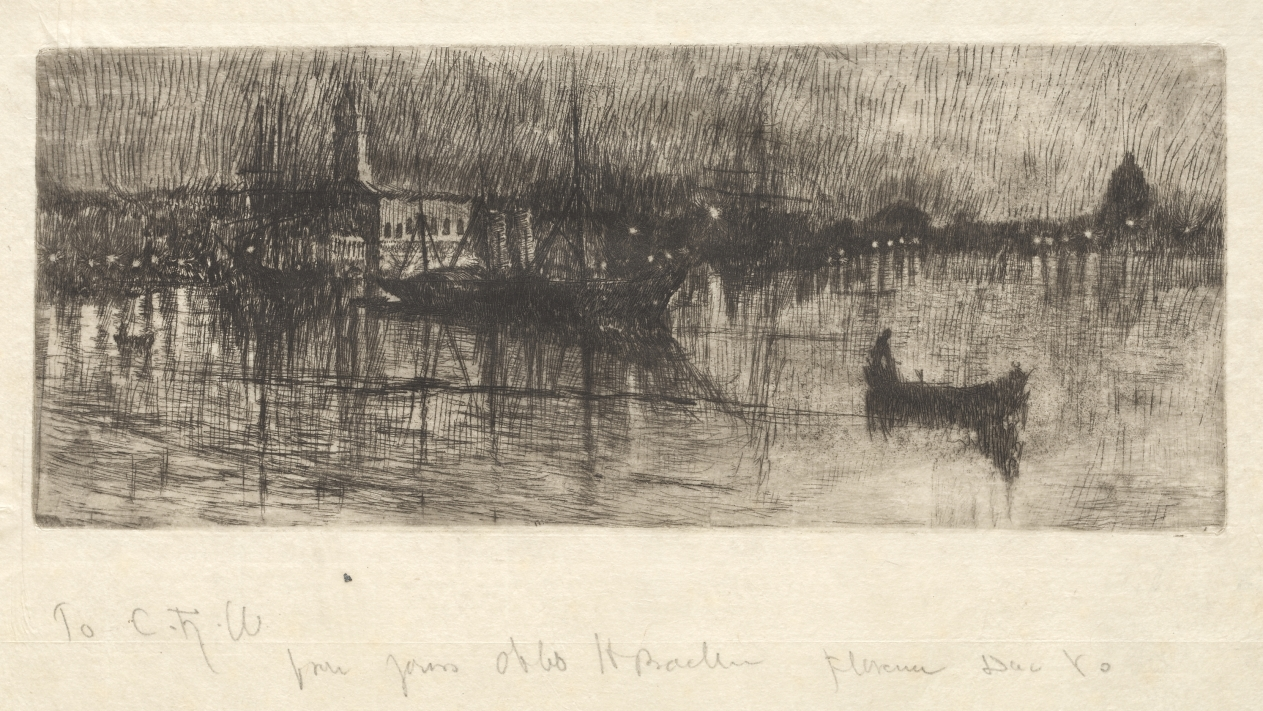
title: Rainy Night, Venice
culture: America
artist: Otto H. Bacher (American, 1856–1909)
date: 1880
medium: etching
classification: Print